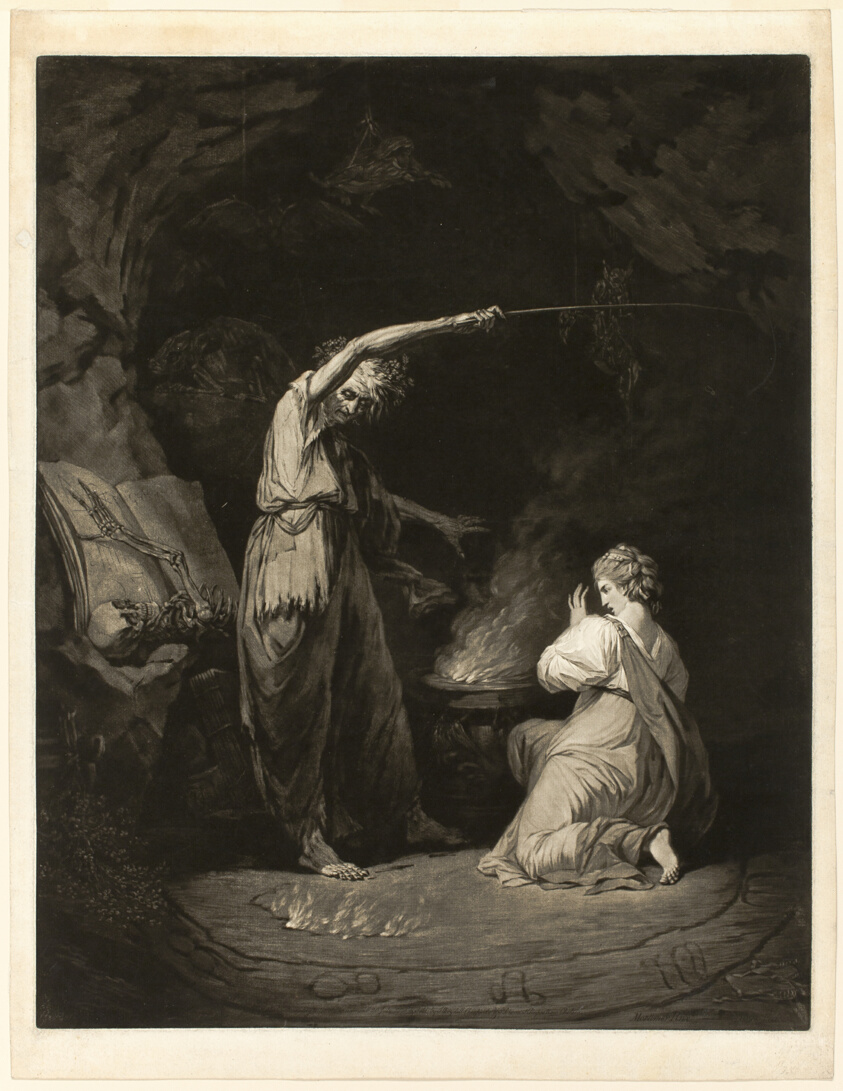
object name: Print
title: An Incantation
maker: John Dixon (English, born Ireland, 1720/30-1804); after John Hamilton Mortimer (English, 1740-1779)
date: 1772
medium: Mezzotint with touches of engraving in black on ivory laid paper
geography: England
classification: mezzotint; print; prints and drawing